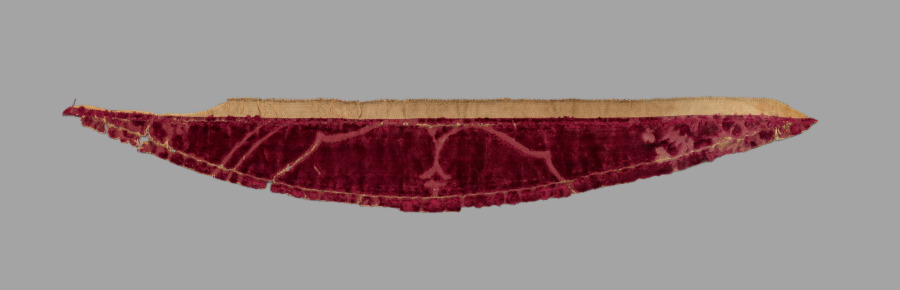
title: Pieces from Disassembled Cape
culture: Italy, 15th century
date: 1400s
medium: Velvet (cut and voided)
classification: Velvet